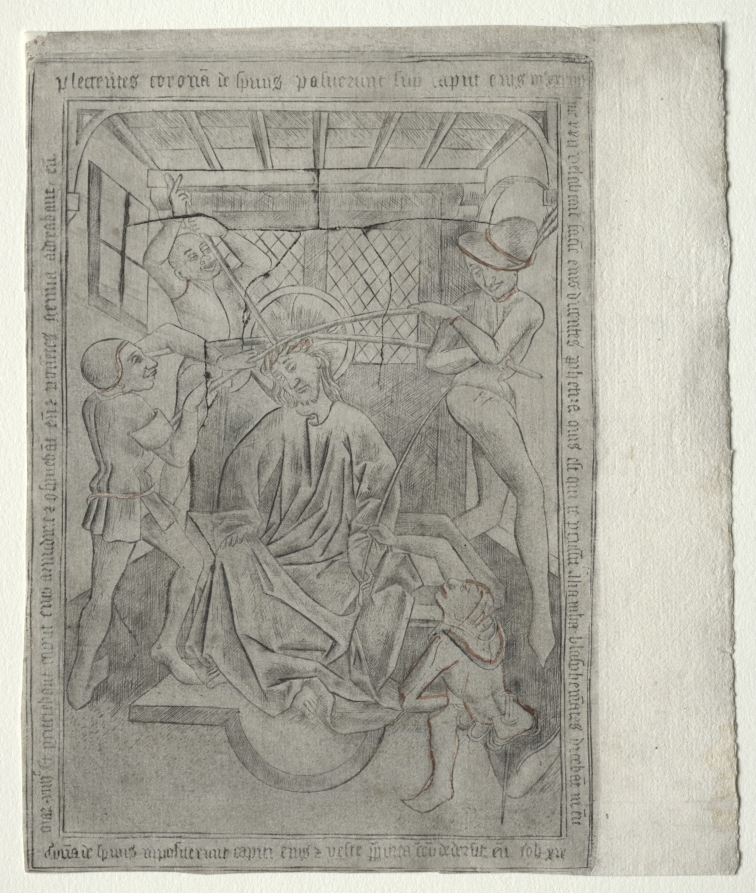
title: The Passion: Christ Crowning with Thorns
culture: Netherlands, 15th century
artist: Master of the Banderoles (Netherlandish, active about 1450–75)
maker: after Master ES (German, active 1450–67)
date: c. 1450–75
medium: engraving with traces of hand coloring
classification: Print